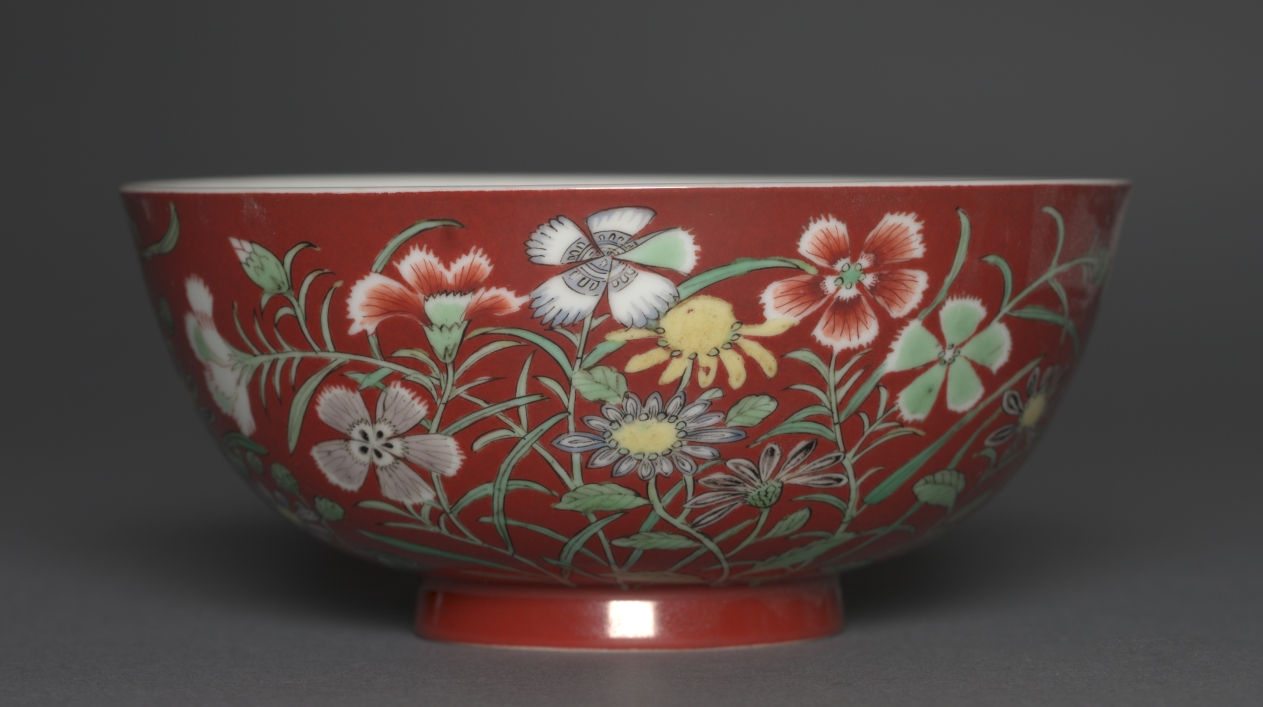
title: Bowl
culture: China, Jiangxi province, Jingdezhen kilns, Qing dynasty (1644-1911), Yongzheng mark and reign (1723-35)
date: 1723–35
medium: porcelain with overglaze enamel decoration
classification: Ceramic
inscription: 雍正御製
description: Flowers in vivid colors including peonies, lilies, and chrysanthemums are set against a brilliant red enamel ground. The petals and veins of leaves are depicted in fine outlines and soft colors demonstrating the craftsman’s excellent painting skill. This porcelain exemplifies the technical perfection of Qing dynasty court artisans who surpassed their predecessors in technical skill. The bowl bears a mark on its base reading “Made for Emperor Yongzheng 雍正御製.” The Yongzheng emperor was one of the three early Qing emperors whose taste greatly influenced art production and collecting.